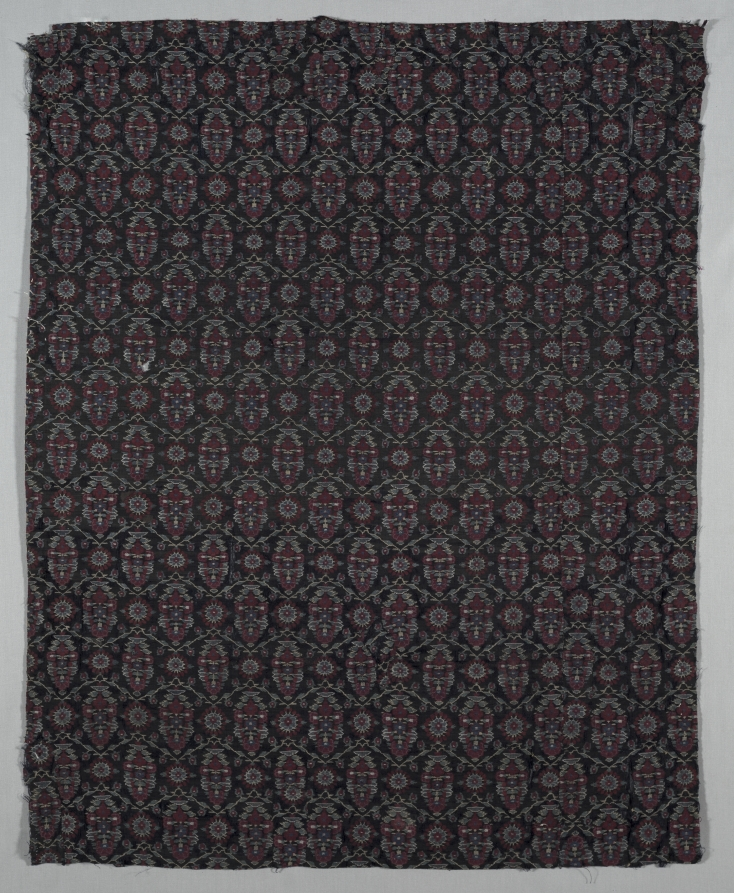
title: Fragment of a Shawl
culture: India, Kashmir, late 18th or early 19th century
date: late 1700s or early 1800s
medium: tapestry twill; wool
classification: Textile